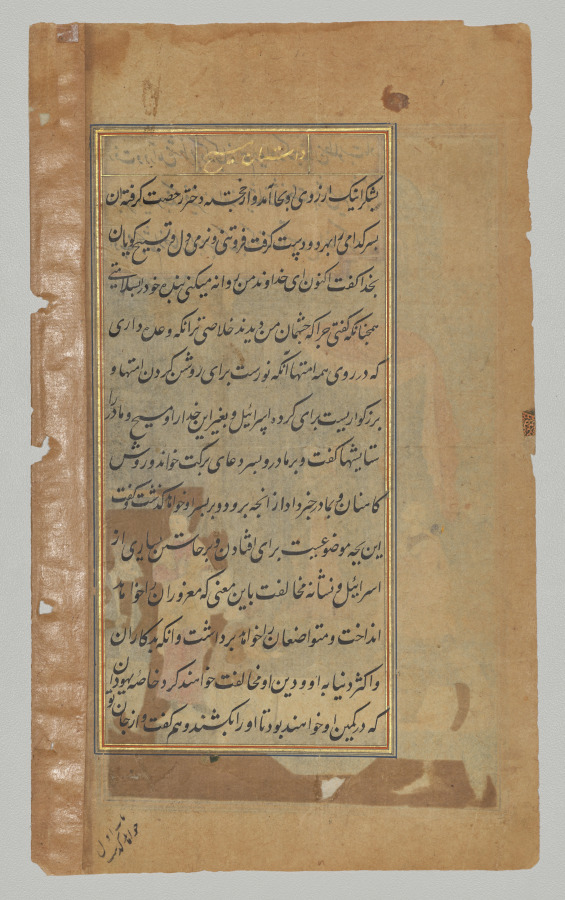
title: Simeon Kneels in Front of Mary and Jesus after Recognizing Them (folio 40 recto), from a Mirror of Holiness (Mir’at al-quds) of Father Jerome Xavier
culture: Mughal India, Allahabad, made for Prince Salim (1569–1627)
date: 1602–4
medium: Gum tempera, ink, and gold on paper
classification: Manuscript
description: Simeon had heard a prophecy that he would encounter the Messiah with his mother in the temple at Jerusalem. This painting depicts his moment of recognition that the prophecy had come true. The temple is populated by Jewish teachers and scholars, and a number of unusual visual elements. A dragon-headed vase is set by the stairs, and niches for vases flank the entrance, possibly in reference to Mary’s status as a vessel for the divine. The form of the temple itself seems to be an imaginative combination of Hindu temple architecture and a Mughal palace.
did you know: A man in the lower left offers grapes to a dog.